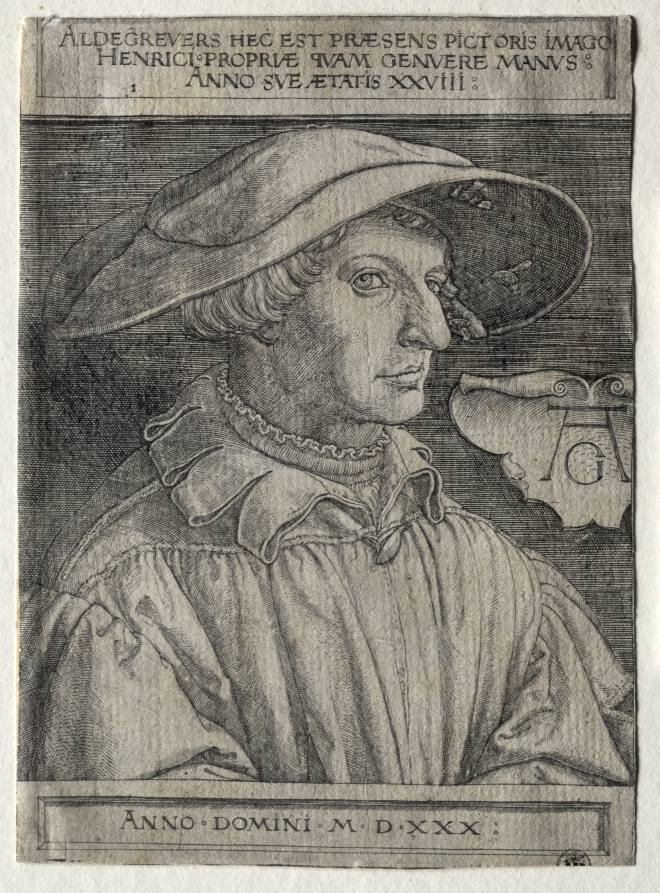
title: Self-Portrait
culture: Germany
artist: Heinrich Aldegrever (German, 1502–1555/61)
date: 1530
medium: engraving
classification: Print